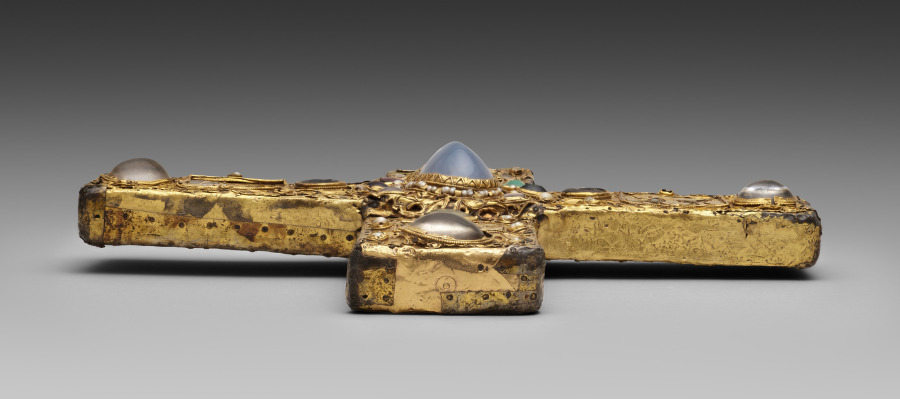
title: Ceremonial Cross of Count Liudolf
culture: Germany, Lower Saxony?, Romanesque period, 11th century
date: shortly after 1038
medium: gold: worked in repoussé; cloisonné enamel; intaglio gems; pearls; wood core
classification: Metalwork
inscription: translation of the inscription on back: Relics of the Holy Bishop Valerius, of the Holy Martyr Pancratius, of the Stone which was laid on the tomb of the Lord. This Gertrude had made for the spiritual welfare of Count Liudolf.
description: This precious gold cross was commissioned by Countess Gertrude (died 1077) and given to the church of Saint Blaise following the death of her husband, Count Liudolf of Brunswick (died 1038). The cross is decorated with a large oval-shaped chalcedony at its center and with slightly smaller rock crystals at its terminal ends. Fine but fragmentary cloisonné enamel plaques with pairs of confronting peacocks, symbols of immortality, appear at the center of each cross arms. They are set within an intricate system of filigree wire decoration imitating tendrils. Numerous pearls, three large intaglio gems, and various precious and semiprecious stones complete the decoration of the cross. Concealed behind the enamel plaque on the upper cross arm are relics of Saints Valerius and Pancratius as well as a fragment from the stone that sealed the Sepulcher of the Lord. The back of this cross is very worn, making it difficult to recognize the main features of its repoussé decoration. Faintly visible at the center is the Lamb of God, a symbol of Christ, with a cross-shaped halo. Depicted at the end of the cross arms are the symbols of the four Evangelists. A Latin inscription above the Lamb of God identifies the relics concealed behind it, namely "relics of the saintly bishop Valerius, of Pancratius martyr, [and] of the stone that was placed above the tomb of the Lord." A second inscription below states, "This [work] was commissioned by Gertrude for the soul of Count Liudolf," revealing the identity of the cross's patron and the approximate date of its commission.